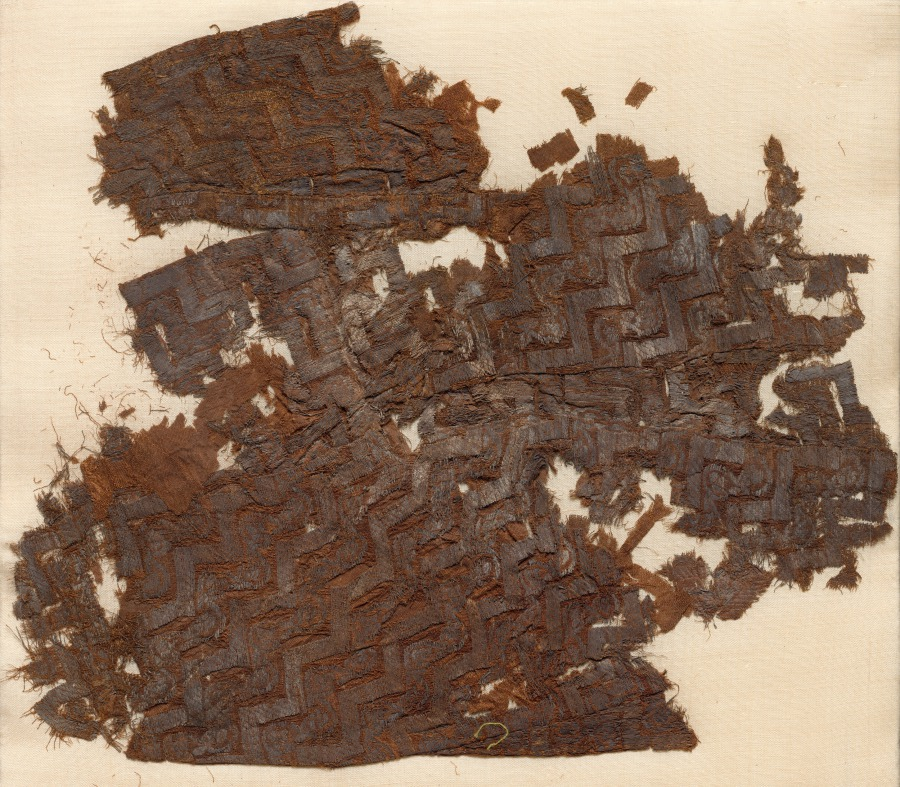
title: Fragment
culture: Unassigned, Probably Modern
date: before 1968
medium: silk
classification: Textile